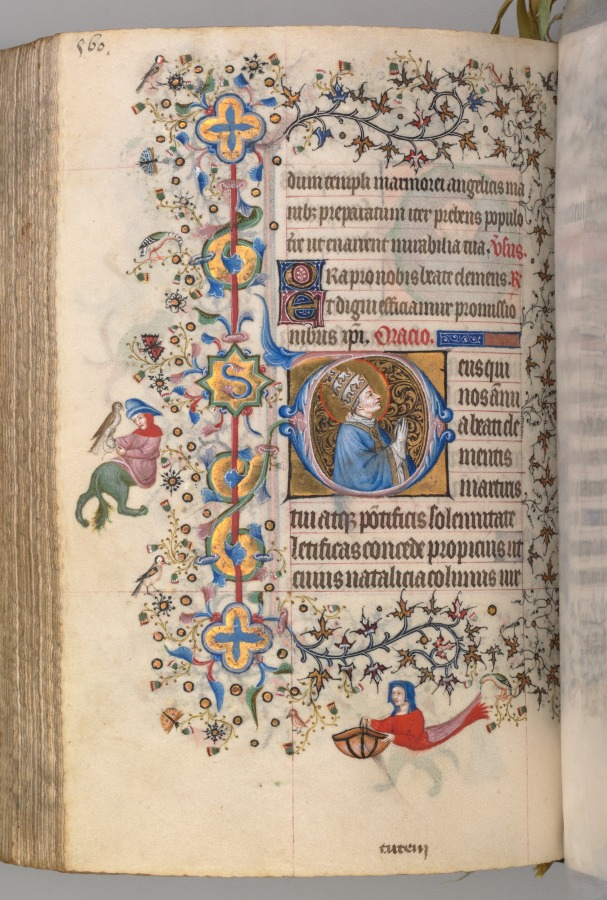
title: Hours of Charles the Noble, King of Navarre (1361-1425): fol. 274v, St. Clement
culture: France, Paris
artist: Master of the Brussels Initials and Associates (French)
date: c. 1405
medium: ink, tempera, and gold on vellum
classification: Bound Volume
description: This precious volume was obviously highly prized by its owner, the French-born King of Navarre, who had his coat of arms painted on no less than twenty folios. Rather than directly commissioning this manuscript from a specific workshop, it seems that Charles the Noble acquired his book of hours -- perhaps ready-made for the luxury market -- while on a trip to Paris in 1404-05. A collaborative effort, six painting styles are evidenced within the pages of this codex, those of two Italians, two Frenchmen, and two Netherlanders. The painter who was responsible for the planning and decoration of the book, and who produced seventeen of the large miniatures, was a Bolognese artist known as the Master of the Brussels Initials. His principal assistant, responsible for most of the borders, was a Florentine who signed his name "Zecho" da Firenze on folio 208 verso.